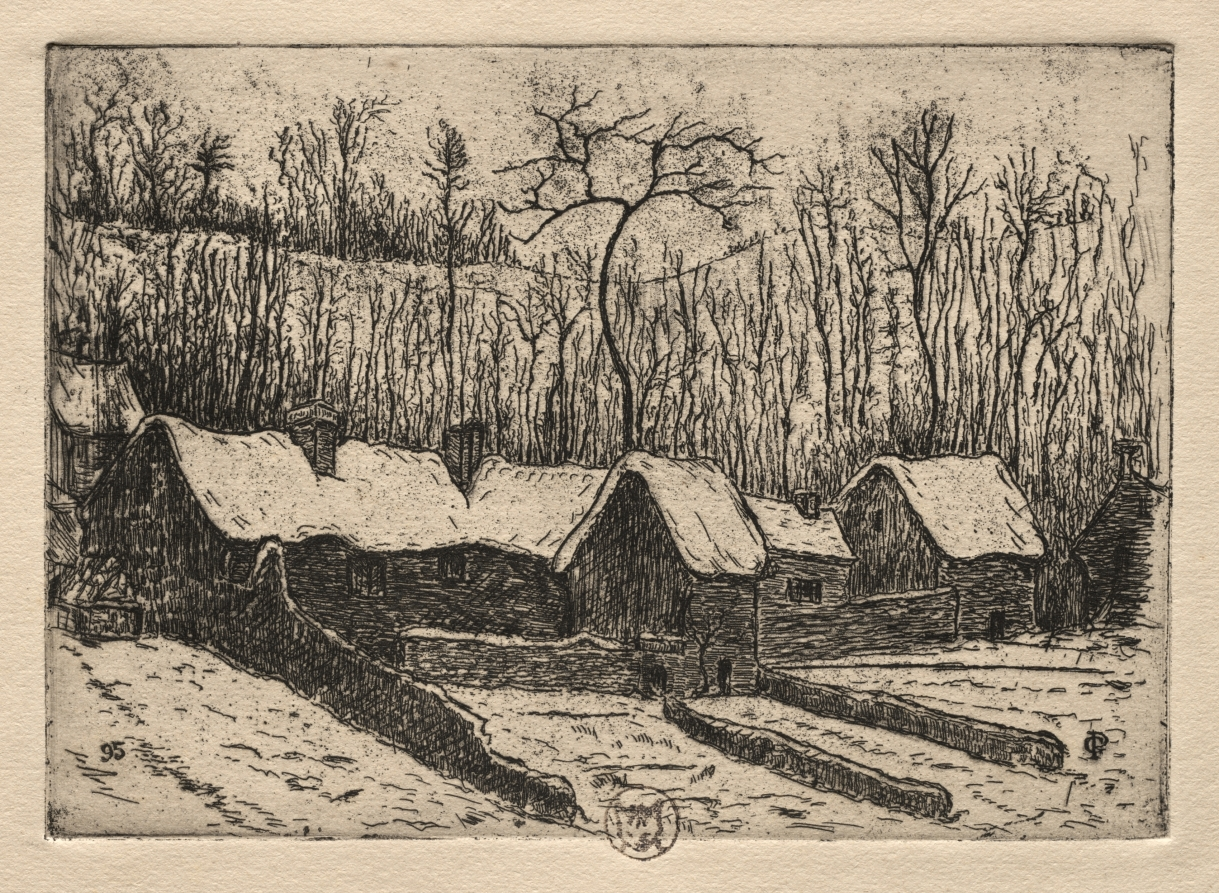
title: Six Etchings: The Thatched Bakery, Auvers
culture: France, 19th century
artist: Paul Gachet (French, 1828–1909)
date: 1895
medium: etching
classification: Print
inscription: verso, in brown ink: Les Chaumes de Four, Auvers